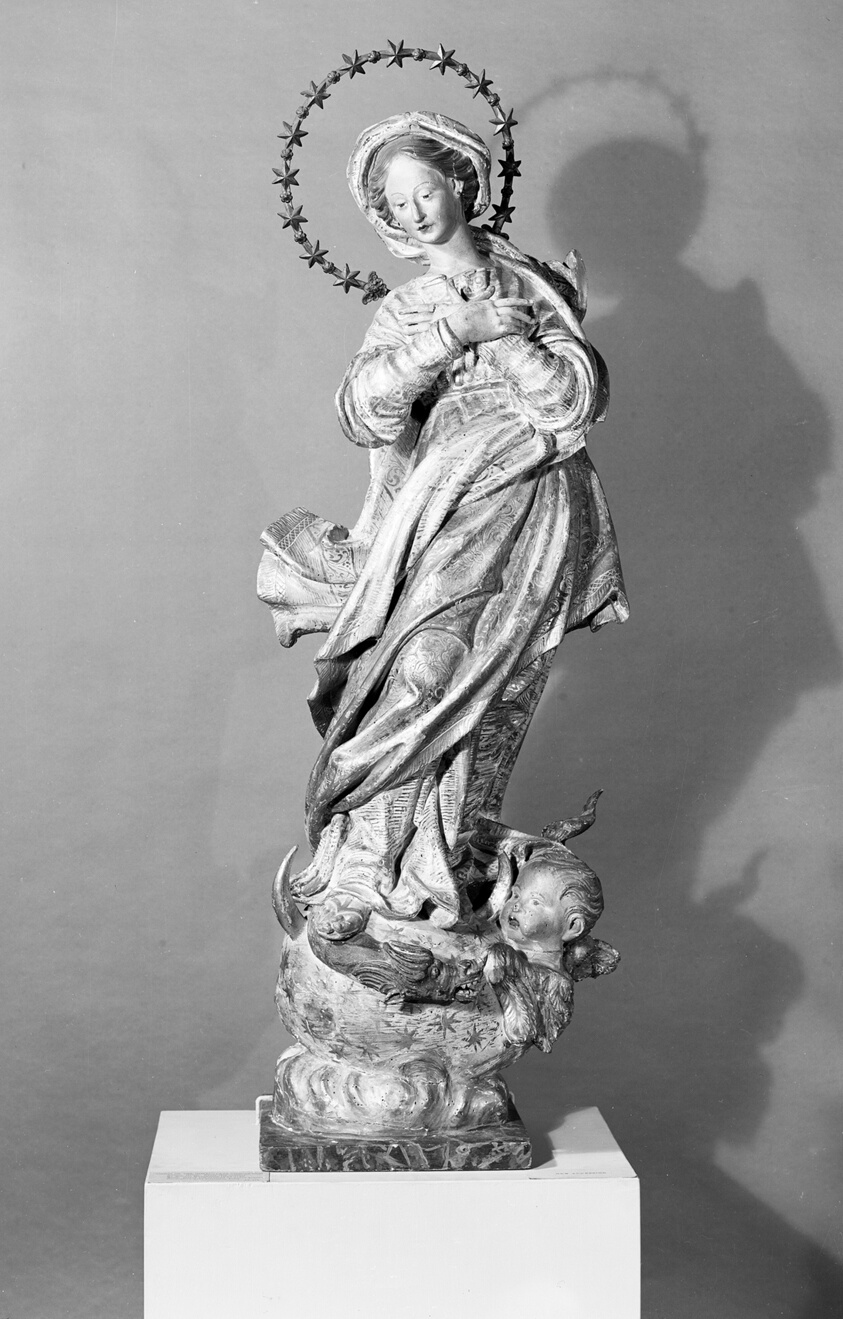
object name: Sculpture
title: Virgin of the Immaculate Conception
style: 18th Century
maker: Antonio Maragliano (Italian, 1664–1741); Workshop of Antonio Maragliano (Italian, 1664–1741)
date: 1710/20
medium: Wood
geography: Italy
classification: large scale; sculpture; figure; Italian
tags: Virgin Mary, cherubs, Christian subjects, Christianity, Devotion, religion, religious, religious figures, star, stars, woman